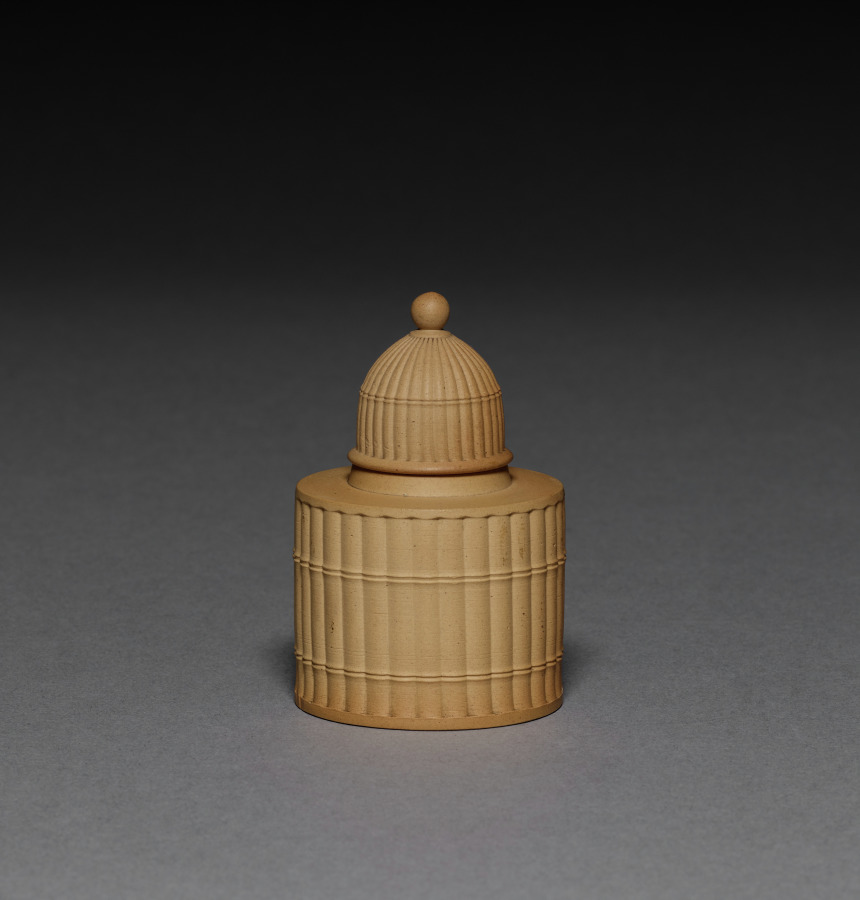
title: Caneware Jar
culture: England, Staffordshire, 18th century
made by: Wedgwood Factory (British)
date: c. 1795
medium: stoneware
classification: Ceramic